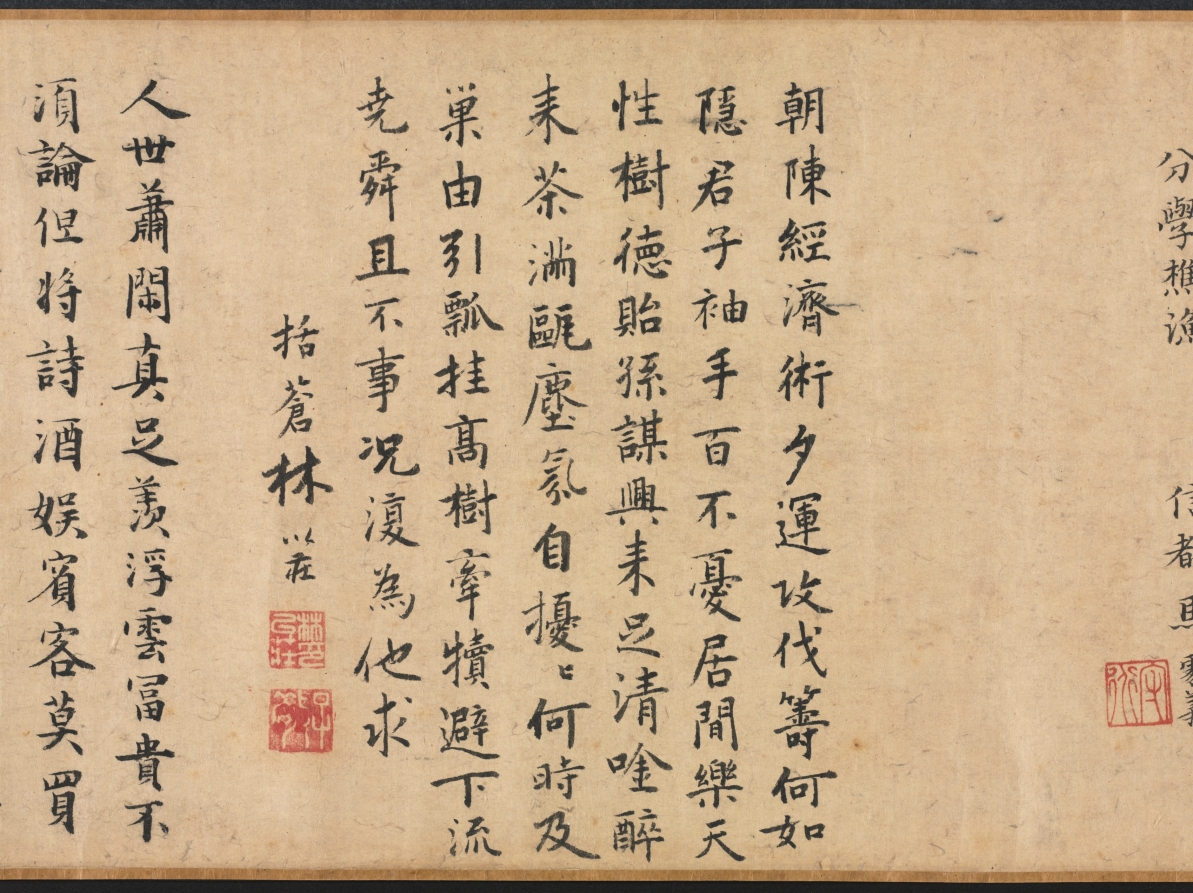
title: Leisure Enough to Spare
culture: China, Yuan dynasty (1271-1368)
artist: Yao Tingmei (Chinese, active mid-1300s)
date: 1360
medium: handscroll, ink on paper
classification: Painting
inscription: 至正廿年春正月_日作此併系鄙語于尾 地偏人遠閉柴關，滿院松陰白晝閒。 眼底風塵渾忘却，坐看流水臥看山。 吳興姚廷美畫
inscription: 23 colophons and 53 seals (dates unavailable for some): 1 colophon, dated 1360, and 2 seals of Yang Weizhen (1296-1370); 1 colophon and 3 seals of Wan Yi; 1 colophon of Zhang Junde; 1 colophon and 3 seals of Angji (act. ca. mid-14th c.); 1 colophon and 1 seal of Xu Shiquan; 1 colophon and 3 seals of Gao Yu; 1 colophon and 2 seals of Li Mingfu; 1 colophon and 2 seals of Lu Lin; 1 colophon and 1 seal of Zhang Qian; 1 colophon of Tao Tangwen; 1 colophon and 1 seal of Wu Yuangui (act. ca. 1300-60); 1 colophon of Bao Jiong; 1 colophon of Wang Zao; 1 colophon and 1 seal of Ma Chuyi; 1 colophon and 1 seal of Lin Yizhuang; 1 colophon and 1 seal of Gu Shunju; 1 colophon and 2 seals of Wang Jing; 1 colophon and 2 seals of Lin Shouchang; 1 colophon and 1 seal of Gao Zhidao; 1 colophon of Lin Xun; 1 colophon, dated 1359, and 2 seals of Meng Weicheng (act. mid-14th c.); 1 colophon and 1 seal of Meng Zhiji (act. mid-l4th c.); 14 seals of Liang Qingbiao 梁清標 (1620-1691); 1 poem dated 1755 and 5 seals of the Qianlong 乾隆 emperor (r. 1736-95); 2 seals of the Jiaqing 嘉慶 emperor (r. 1796-1821); 3 seals of the Xuantong 宣統 emperor (r. 1909-11).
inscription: Title on frontispiece by Zhang Bi 章弼: Signed Gongchen 拱辰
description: Seclusion and leisure—the ideals of the literati, or scholar-gentlemen—are expressed in this mature work by Yao Tingmei. The theme acquired special meaning at a time of the military uprisings near the end of the Yuan dynasty. Dedicated to an ascetic named Du, this work combines painting, calligraphy, and poetry; following the painting are more than 20 poems and essays written by notable scholars, one of whom was the calligrapher Yang Weizhen. It reveals not only the aesthetic taste of the literati but also the practice of contributing artistic and literary works to fulfill social obligations. Yao's painting demonstrates his individual style derived from various ancient masters (Guo Xi, Dong Yuan, and Juran). Yang Weizhen's calligraphy exhibits his bold, vigorous style and his intent to capture the spirit of antiquity in art.